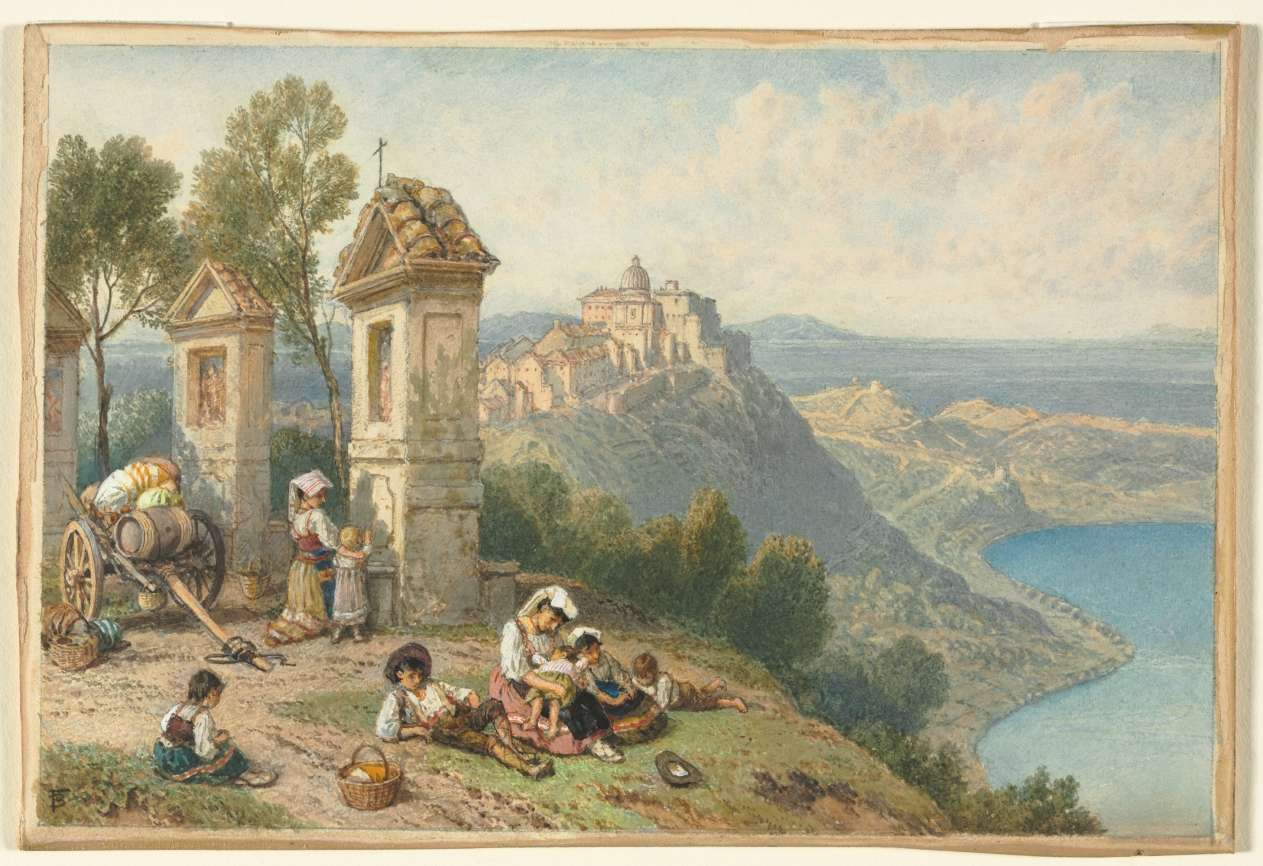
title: View of Castel Gandolfo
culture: England, 19th century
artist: Myles Birket Foster (British, 1825–1899)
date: c. 1870s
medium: watercolor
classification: Drawing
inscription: Signed with monogram, lower left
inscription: Verso, center, "V.G. Fischer Art Gall's, Wash. D.C."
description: In his watercolors, Foster depicted an idealized life in rural England. His work was appreciated as Pre-Raphaelite in its intricate detail, but was without the harsh color and unorthodox subjects that made the brotherhood controversial. Foster’s watercolors proved enormously appealing to the Victorians; each new work was eagerly anticipated, and color lithographs after his watercolors helped popularize his imagery. While the English countryside was the inspiration for much of his work, he traveled abroad regularly, and made several trips to Italy in the 1870s. A view of peasants picnicking at the gates of Castel Gandolfo overlooking Lake Albano is the subject of this watercolor.